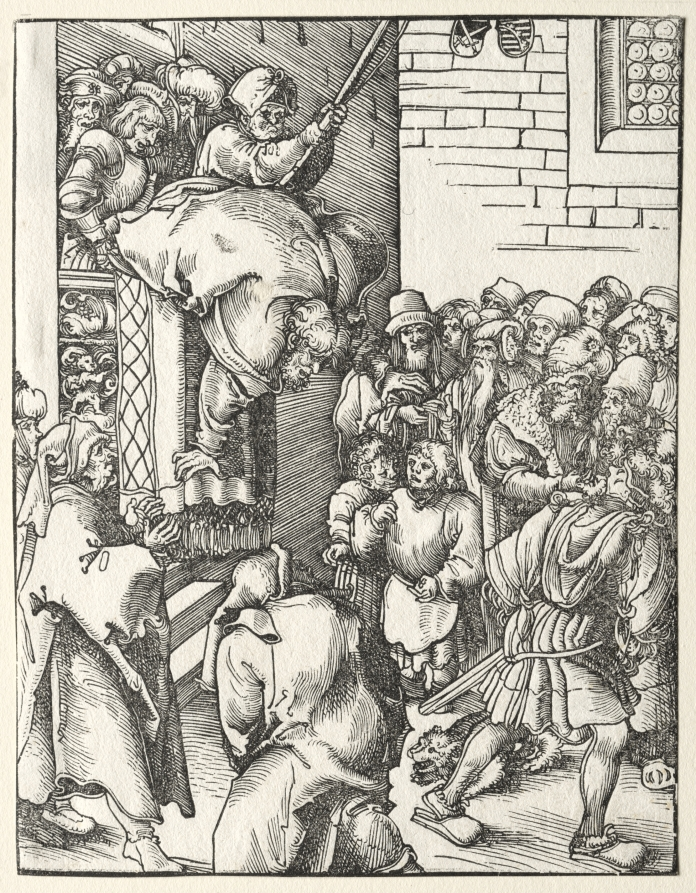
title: Martyrdom of St. James the Less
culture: Germany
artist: Lucas Cranach (German, 1472–1553)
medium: woodcut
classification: Print